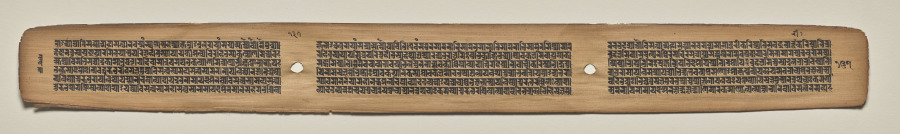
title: Text, Folio 137 (verso), from a Manuscript of the Perfection of Wisdom in Eight Thousand Lines (Ashtasahasrika Prajnaparamita-sutra)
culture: Eastern India, Bihar, Vikramashila Monastery. Painting: Nepal, Kathmandu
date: Sunday, September 14, 1119 (year 239 of the Newar Samvat in the month of Ashvina)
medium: gum tempera and ink on palm leaves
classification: Painting